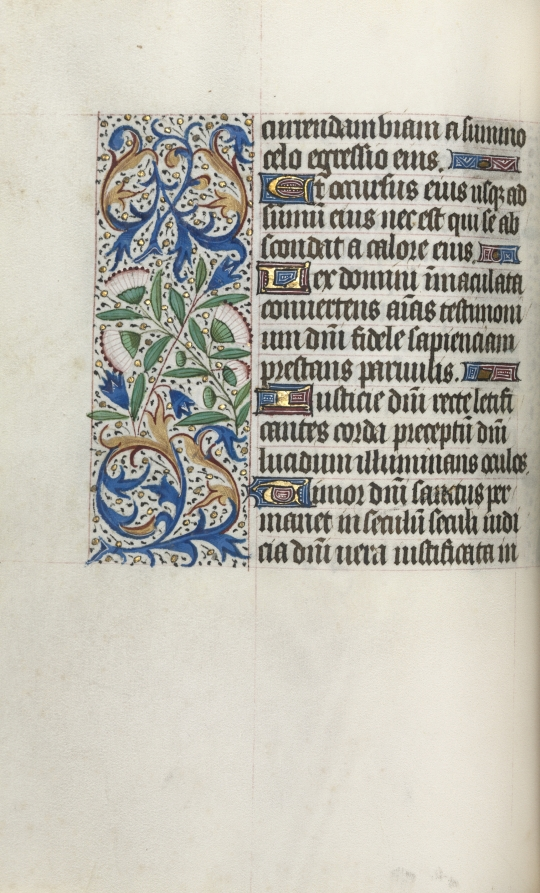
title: Book of Hours (Use of Rouen): fol. 32v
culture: France, Rouen, 15th century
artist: Master of the Geneva Latini (French, active Rouen, 1460–80)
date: c. 1470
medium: ink, tempera, and gold on vellum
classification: Bound Volume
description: In the late 1400s and early 1500s Rouen was an established and important center of book production. The city’s cathedral had a wealthy chapter that spent large sums of money to commission books and to maintain its extensive library. The stationers and booksellers would have likely been concentrated in or near the cathedral precinct. This artist, named after a manuscript now in Geneva, was Rouen’s principal illuminator during the second half of the 1400s.